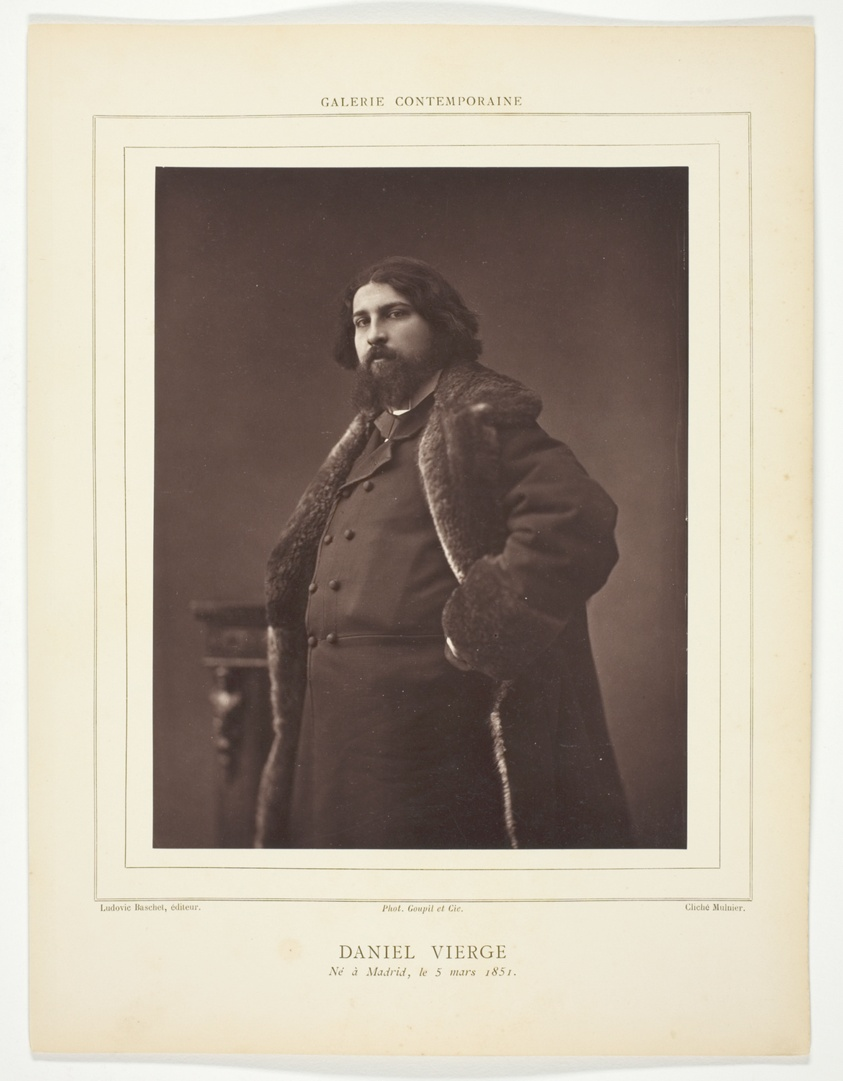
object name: Photograph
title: Daniel Vierge (French illustrator, born Spain, 1851-1904)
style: 19th century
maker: Ferdinand J. Mulnier (French, born 1825, active 1860–1890)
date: c. 1876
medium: Woodburytype, from the periodical “Galerie Contemporaine Littéraire, Artistique” (1877), volume 2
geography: France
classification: woodburytype; photomechanical process; photography; photograph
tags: Collected by Hugh Edwards, Contemporaine Littéraire